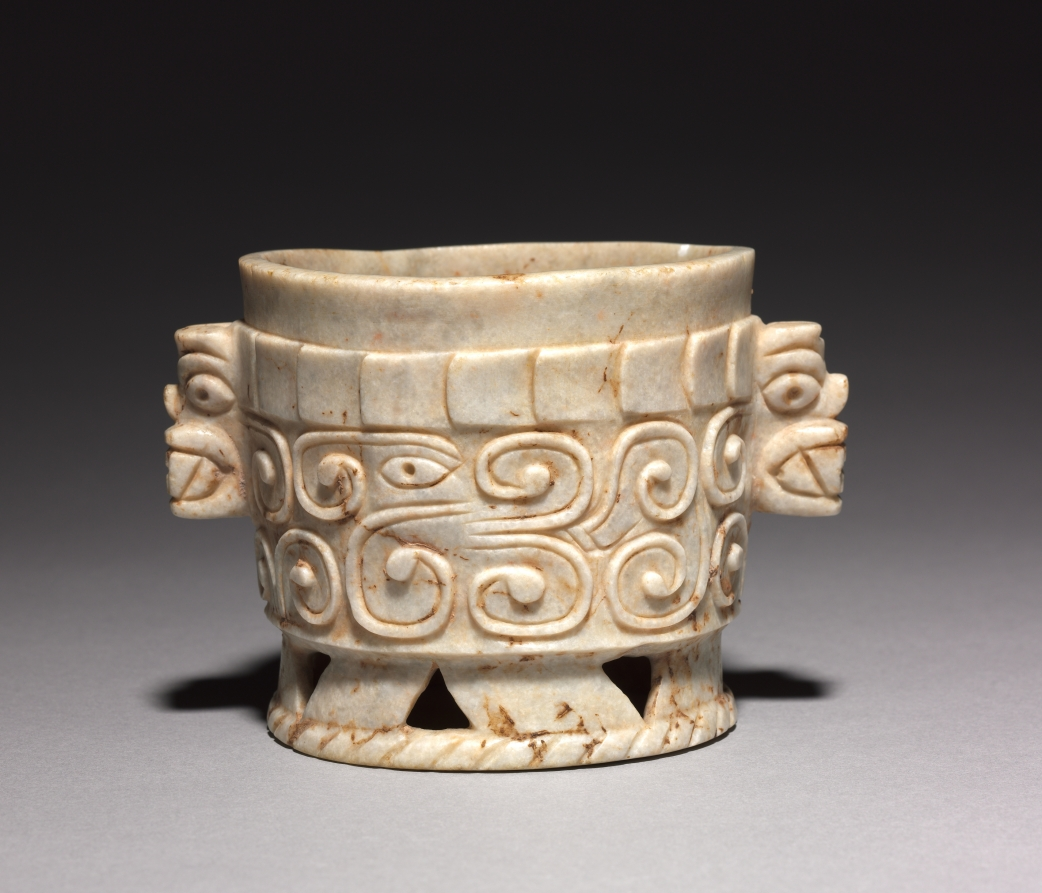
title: Ring-Base Vessel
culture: Honduras, Maya, Ulúa Valley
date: c. 600–1000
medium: marble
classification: Sculpture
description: The Ulúa region of Honduras, to the east of Maya territory, is best known for white marble vessels with walls ornamented in low relief and handles carved as animal heads, here bats but also felines, birds, monkeys, and others. This small example is distinguished by the crispness of its carved scrolls and the triangular cutouts of its pedestal base.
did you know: One of two vessels that were the first ancient American artworks collected by James and Florence Gruener.